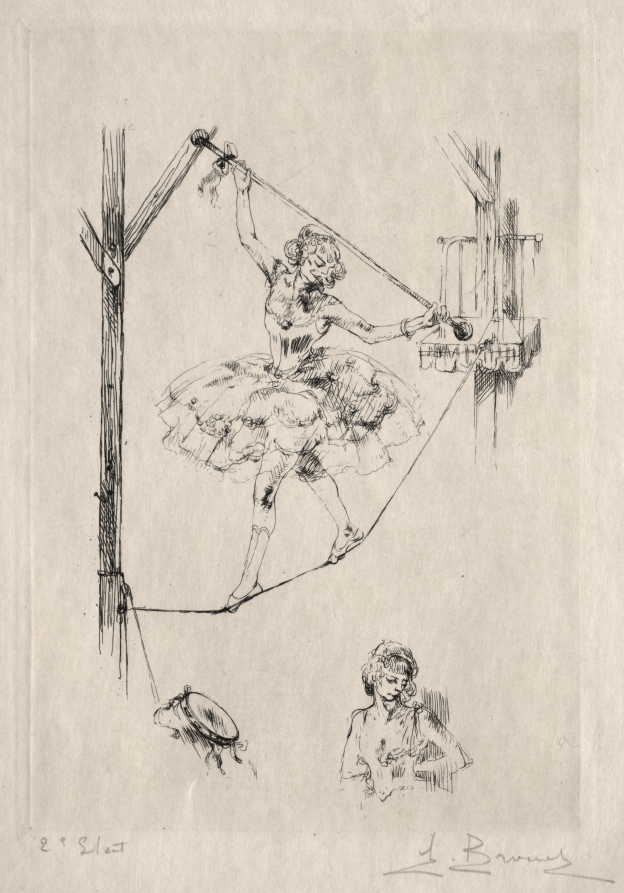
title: Tightrope Dancer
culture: France, 20th century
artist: Auguste Brouet (French, 1872–1941)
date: c. 1902–41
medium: etching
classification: Print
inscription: signed in pencil, lower right: A. Brouet; in pencil, lower left: 2 etat